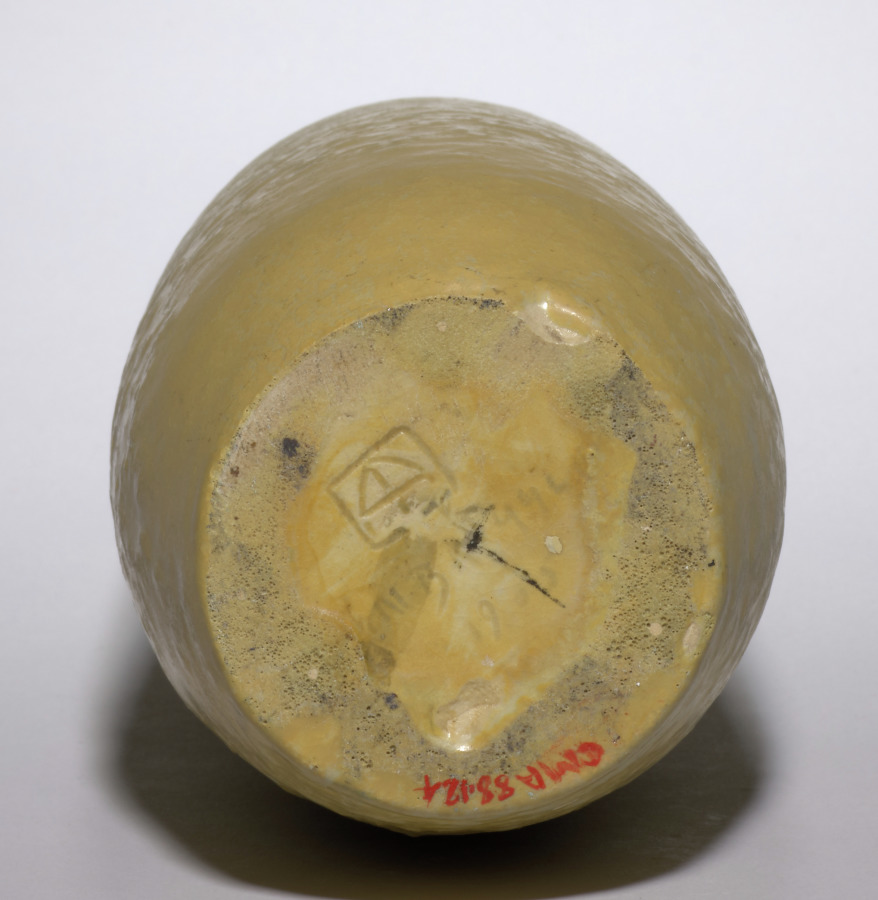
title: Vase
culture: America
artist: firm of Artus Van Briggle (American, 1869–1904)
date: 1905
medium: earthenware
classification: Ceramic